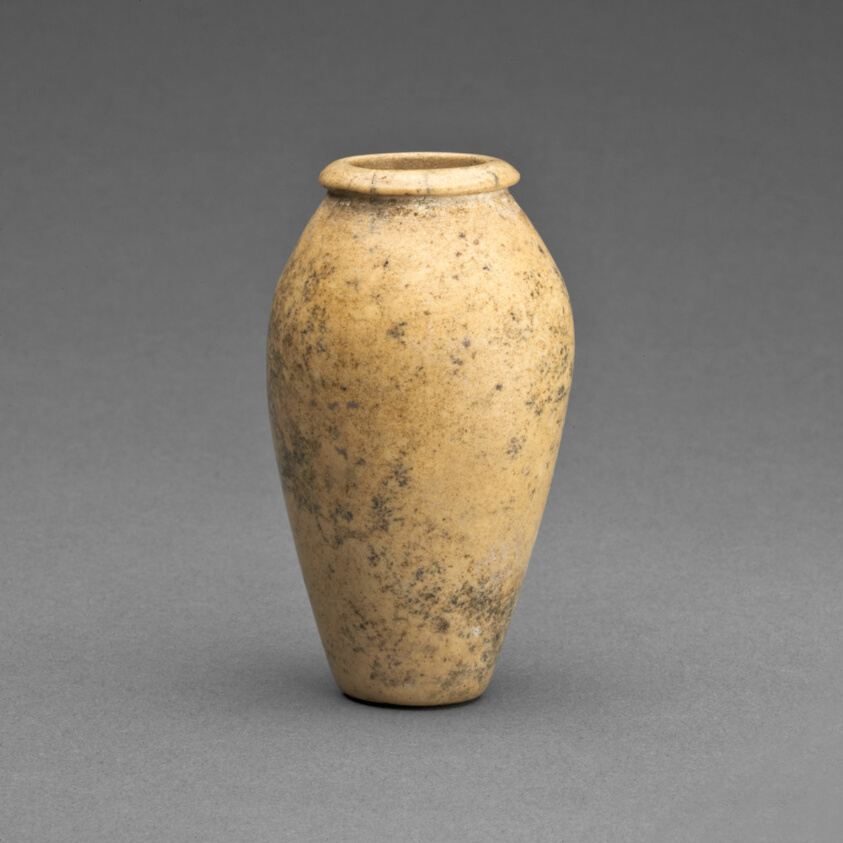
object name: Vessel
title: Jar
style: old kingdom, first intermediate period, egyptian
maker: Egyptian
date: Old Kingdom, Dynasty 3–8 (2707–2219 BCE)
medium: Stone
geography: Egypt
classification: vessel; stone; ancient art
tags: jar